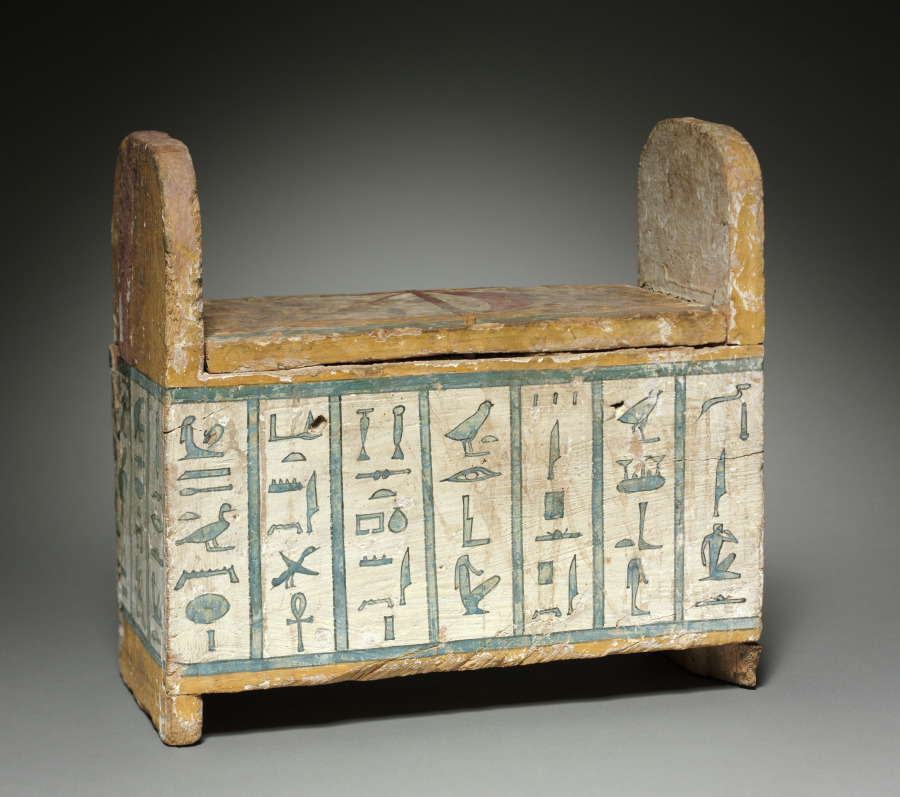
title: Covered Box and Shawabtys of Ditamenpaankh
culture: Egypt, Late period (715–332 BCE), Dynasty 25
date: 715–656 BCE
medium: terracotta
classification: Funerary Equipment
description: High demand for shawabtys in the Late Period, a time when as many as 400 or more shawabtys were placed in the tomb with the deceased, gave rise to a specialized container for storing them: the shawabty box. This example is inscribed for the lady of the house, Ditamenpaankh, and was probably one of a pair originally made for her. The single-masted boat on the box’s lid is perhaps an allusion to the pilgrimage of the deceased to the holy city of Abydos, the cult city of Osiris, king of the dead. The shawabtys inside are crude, mass-produced examples cast in an open mold. Made of terracotta, their blue paint imitates more costly shawabtys made of faience. As for the shawabty spell, it has been removed from its traditional location on the shawabty’s front and relocated onto the sides of box, where it needed only to be written once, thus expediting production.